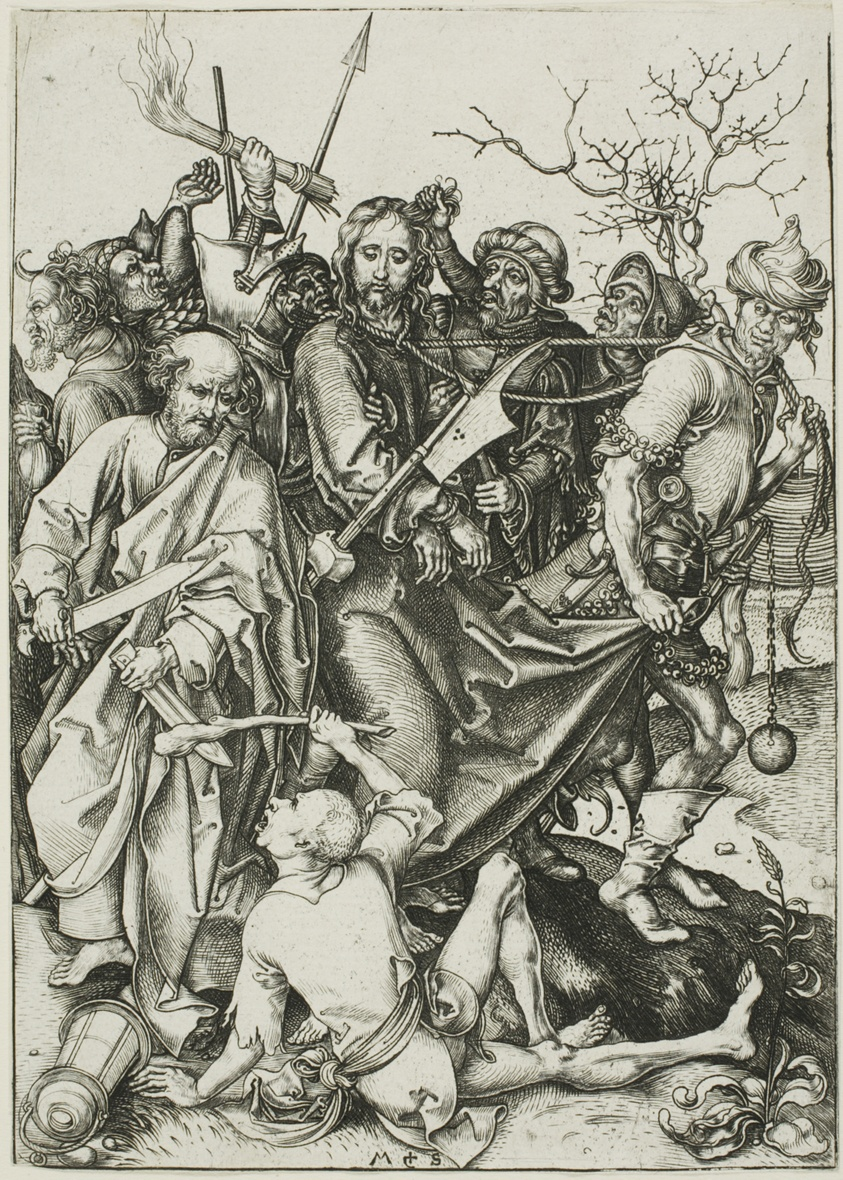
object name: Print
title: The Betrayal of Christ, from The Passion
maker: Martin Schongauer (German, c. 1430/50-1491)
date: c. 1480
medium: Engraving on paper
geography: Germany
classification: engraving; print; prints and drawing